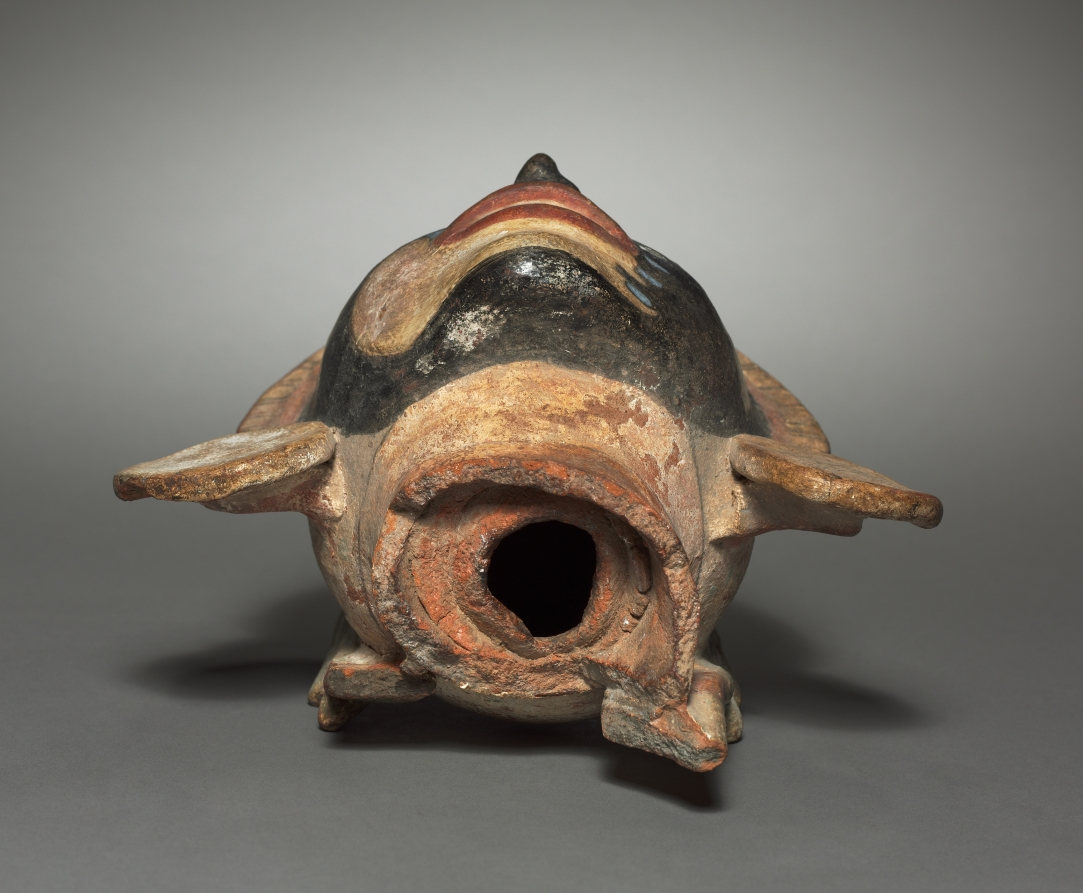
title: Head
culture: Mexico, Classic Veracruz (Totonac or Tajin)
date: 600–1100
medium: pottery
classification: Sculpture